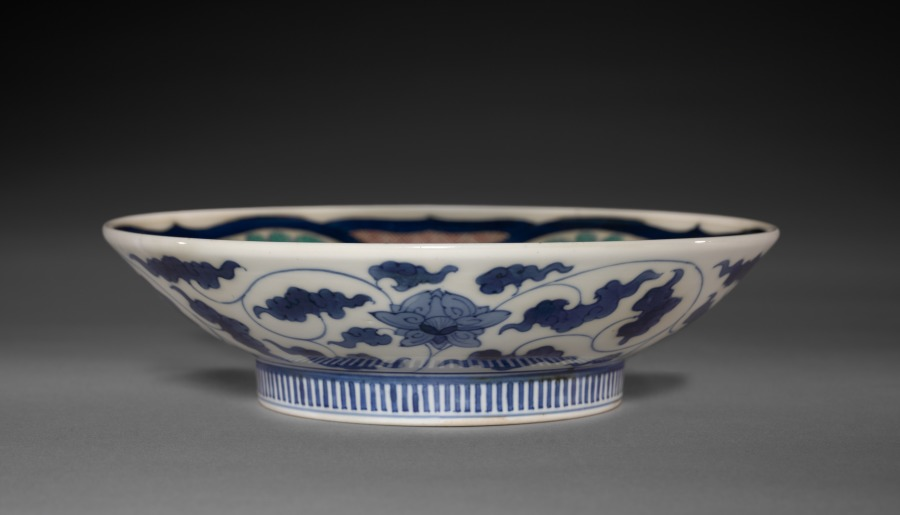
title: Dish with Lotus in Rui-Head-Shaped Cartouches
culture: Japan, Edo period (1615–1868)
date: mid-1800s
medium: Porcelain with underglaze blue and overglaze enamel (Hizen ware, Nabeshima type)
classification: Ceramic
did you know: A ruyi is a curved decorative object with a head like a cloud or lingzhi mushroom.